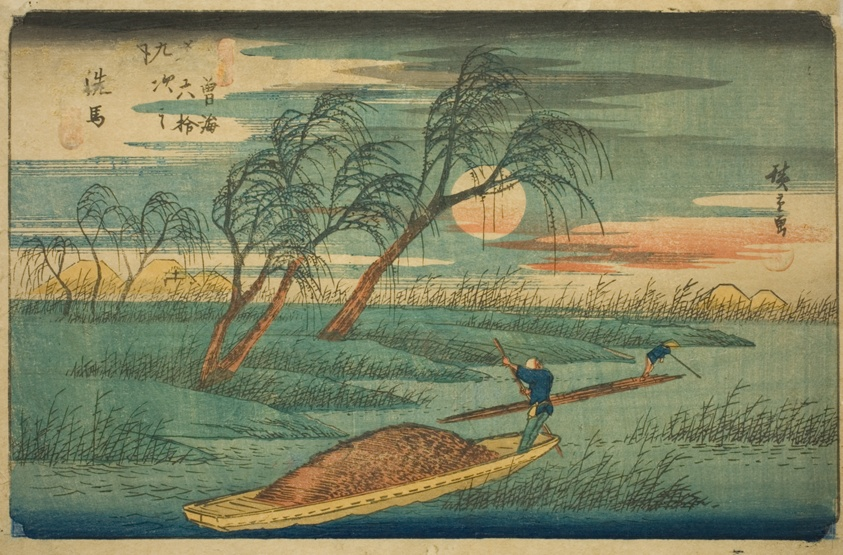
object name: Print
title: No. 32: Seba, from the series "Sixty-nine Stations of the Kisokaido (Kisokaido rokujukyu tsugi no uchi)"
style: Japanese (culture or style)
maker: Utagawa Hiroshige 歌川 広重; Japanese, 1797-1858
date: c. 1835/38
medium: Color woodblock print; oban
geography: Japan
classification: woodblock print; print; asian art